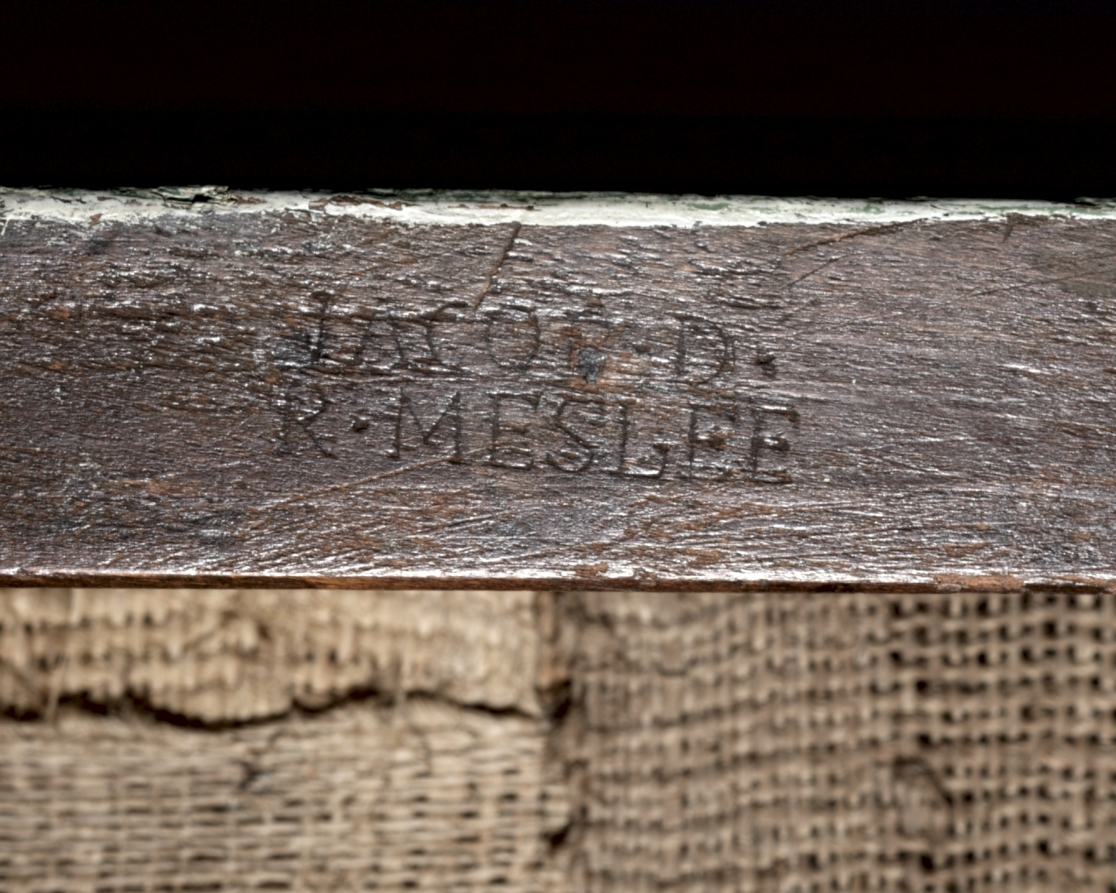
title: Stool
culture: France, Paris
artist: François-Honoré-Georges Jacob (French, 1770–1841)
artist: Georges Jacob (French, 1739–1814)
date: 1805–1813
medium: painted walnut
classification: Furniture and woodwork